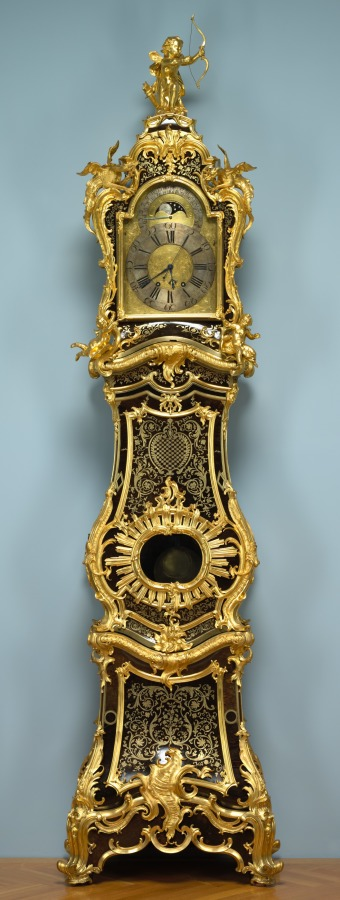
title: Tall- case Clock (Regulateur)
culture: France, Paris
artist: Jean-Pierre Latz (French, 1691–1754)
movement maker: Stollewerck (French)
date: 1744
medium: boulle marquetry with gilt bronze mounts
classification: Furniture and woodwork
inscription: incised on the back of the lowest front panel: .LATZ . A . PARISIIS . FECIT ./. MDCCXLIV; engraved on the clock face: Stollewerck/Paris.